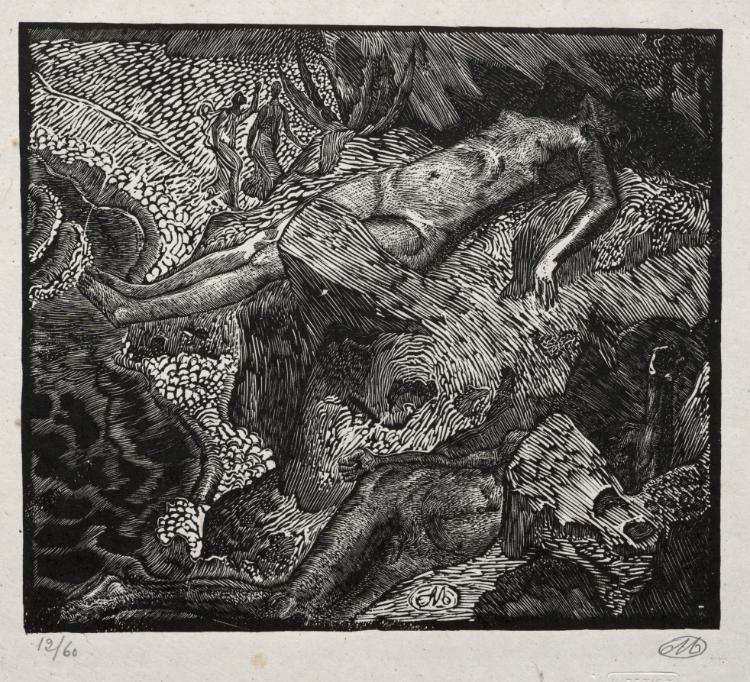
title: Hero and Leander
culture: France, 19th century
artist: Aristide Maillol (French, 1861–1944)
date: 1893–94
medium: wood engraving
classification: Print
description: Maillol executed Hero and Leander just as he was becoming acquainted with Paul Gauguin, whose contemporaneous woodcuts must have influenced this work. However, unlike Gauguin, Maillol filled the entire surface with intricate detail and pattern. Leander lived on the Asian side of the Hellespont, the strait which separates Asia and Europe. His lover, Hero, lived on the opposite shore. Each night Leander swam across the strait to visit Hero, but one evening during a storm he drowned, the waves bearing his body to the European shore. When Hero learned of his death, she cast herself into the sea and perished.